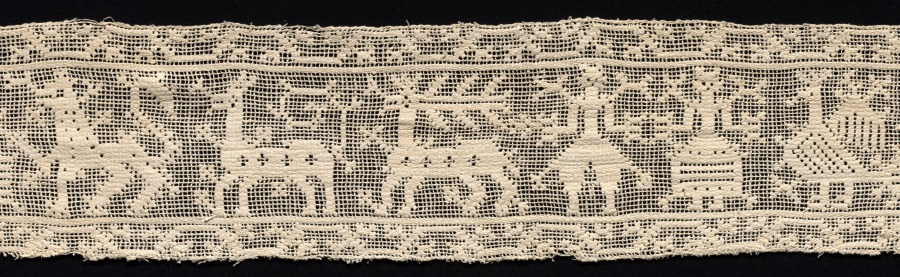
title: Band with Parade of Human Figures, Stags, and Other Fantastic Animals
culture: Italy, Sicily ?, 1500s-1600s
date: 1500s-1600s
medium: Bleached linen (est.): needle lace, burato (twined ground and darned in one direction)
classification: Lace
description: Animals viewed in profile, some with their legs raised, indicate movement, such as a parade or procession. However, the human figures are shown frontally. Linear elements protruding from their backs and hands held out and open suggest the figures may be angels modeling a gesture of prayer.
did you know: Myrta Leonora Jones, the donor of this lace, was a women’s rights activist in Cleveland in the early 1900s.